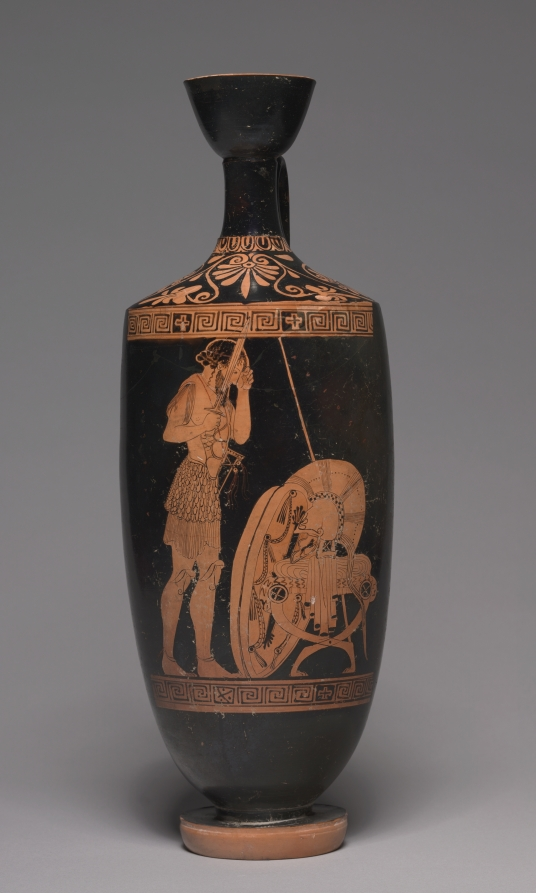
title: Red-Figure Lekythos (Oil Vessel): Warrior Cutting Hair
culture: Greek, Attic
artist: attributed to Oionokles Painter (Greek, Attic, active c. 480–460 BCE)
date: c. 480–470 BCE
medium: ceramic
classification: Ceramic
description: Whether cutting his hair or combing it, this solitary warrior seems to be contemplating his fate. If mythological, he may be Parthenopaios or another of the ill-fated Seven Against Thebes, a band of warriors tasked with overthrowing that central Greek city. The Seven left mementos for their loved ones before departing, and he may be cutting a lock of hair for this reason. The same motive might apply to historical soldiers as well, and he may represent one of the many Greeks who battled the Persians around the time this vase was made. Unfortunately, the inscriptions painted on either side of the figure seem to be nonsense—actual Greek letters that do not spell out recognizable names or words.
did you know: The painter lavished great detail on this warrior’s armor, even including a lion on his helmet’s cheekpiece!